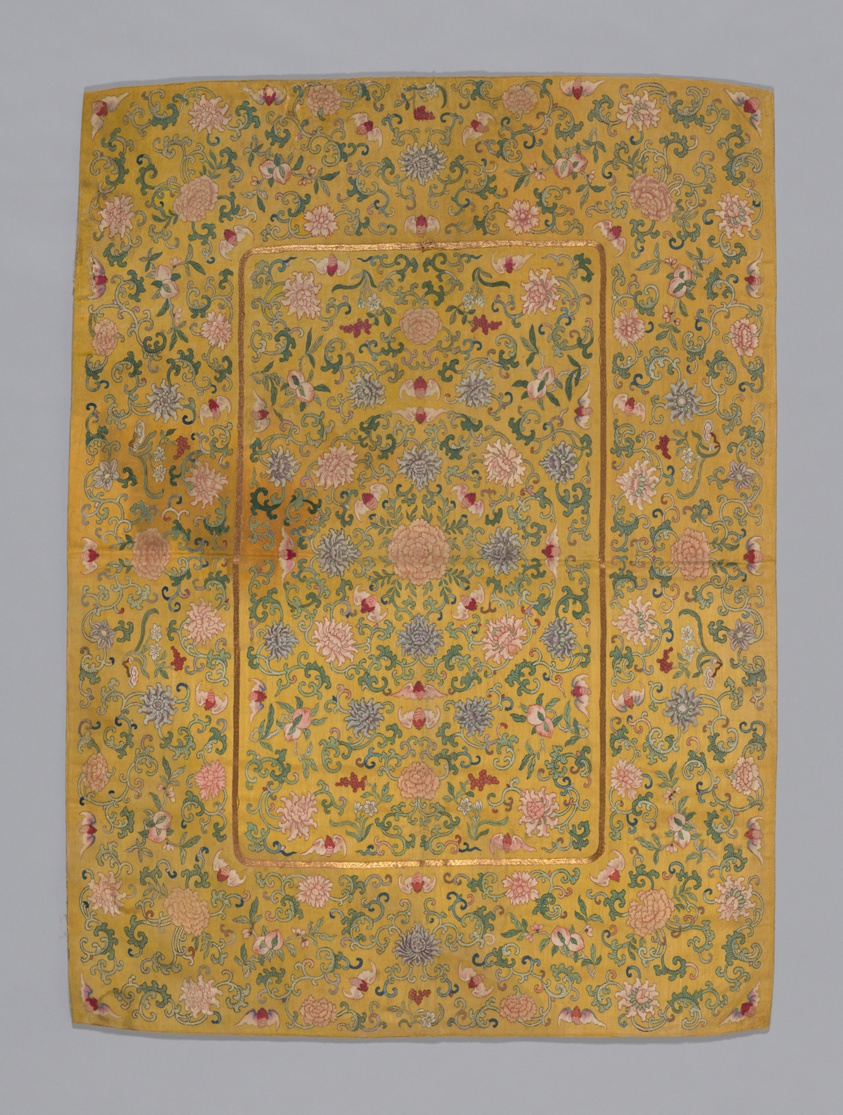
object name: Textile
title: Cover (Furnishing Fabric)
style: qing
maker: China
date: Qing dynasty (1644–1911), 1850/75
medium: Yellow ground with additions of paint.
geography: China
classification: textile; weaving; furnishing textile